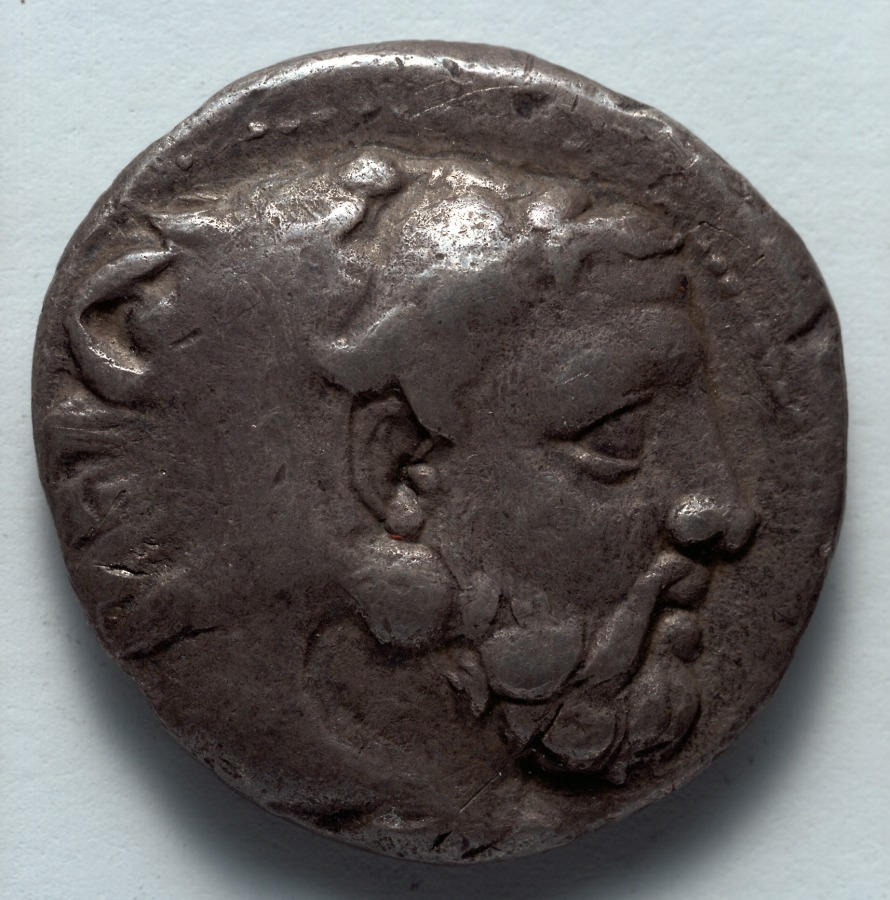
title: Stater: Head of Bearded Herakles (obverse); Horse (reverse)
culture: Greek, Macedonian, probably minted at Pella (Macedonia), reign of Amyntas III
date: 389–369 BCE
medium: silver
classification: Coins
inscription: ΑΜΥΝ | ΤΑ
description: An older, bearded Herakles wears his lion-skin on the obverse of this coin, surrounded by a beaded border. On the reverse, a horse stands within an incuse square, where the inscription ΑΜΥΝ ΤΑ identifies King Amyntas III as ruler. The pairing of head and horse extends back to the earlier Macedonian king Archelaus (413-399 BC), though a young male head sometimes takes the place of Herakles.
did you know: Amyntas III was the father of Philip II and grandfather of Alexander III (the Great).